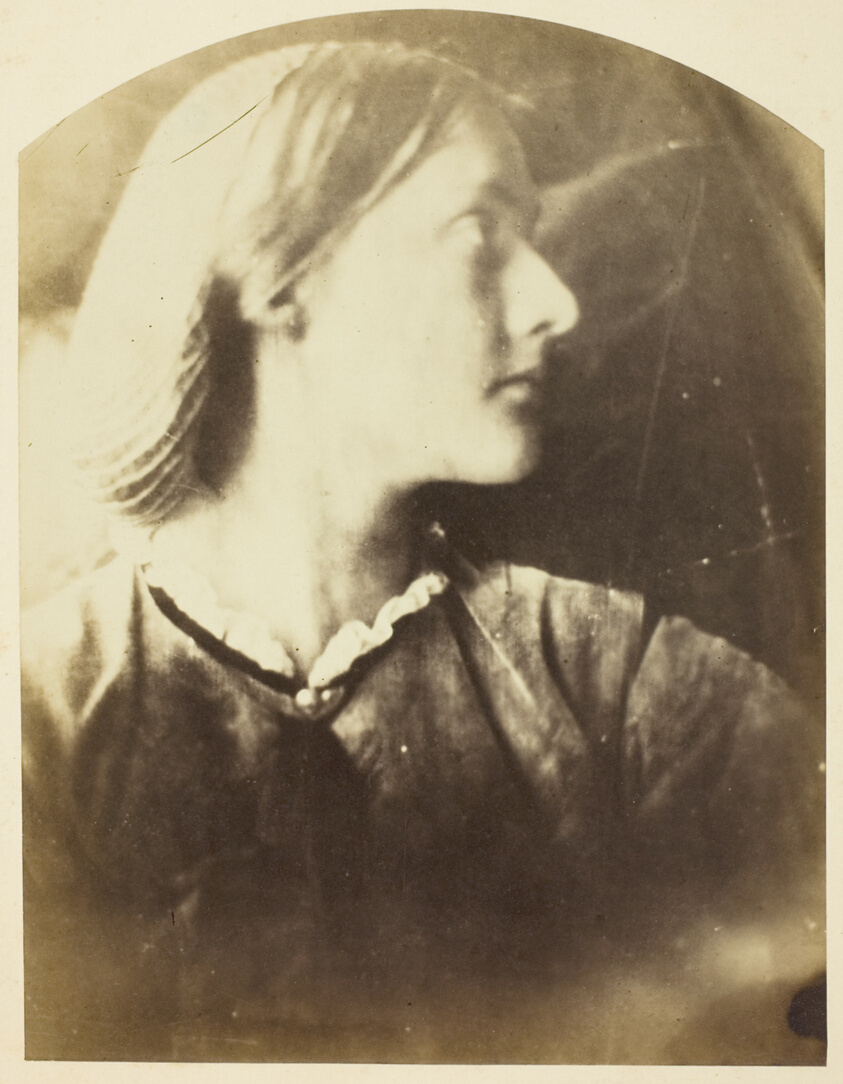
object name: Photograph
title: Untitled (Julia Jackson)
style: 19th century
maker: Julia Margaret Cameron (English, 1815–1879)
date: 1865/66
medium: Albumen print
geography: England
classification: albumen silver print; photographic process; photography; photograph